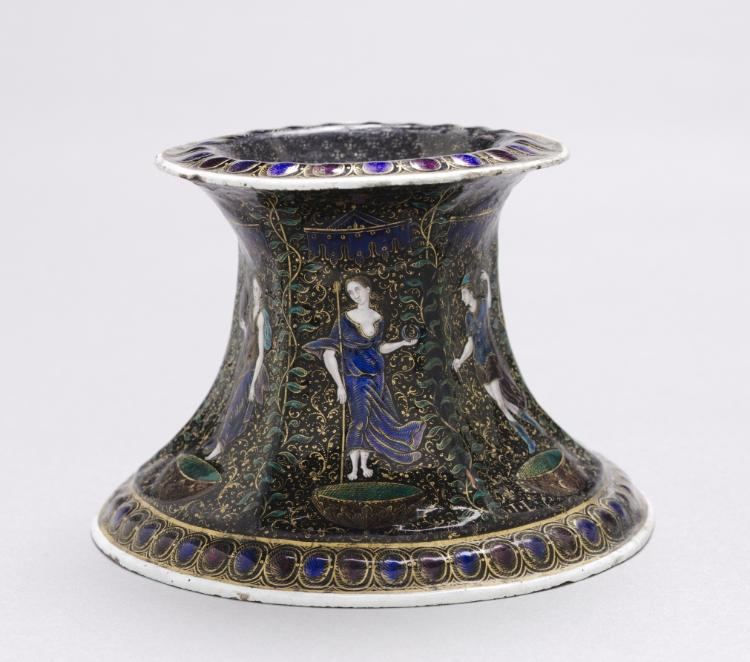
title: Salt Dish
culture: France, Limoges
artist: Jean Limousin (French, 1528–c. 1610)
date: early 1600s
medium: painted enamel on copper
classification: Ceramic